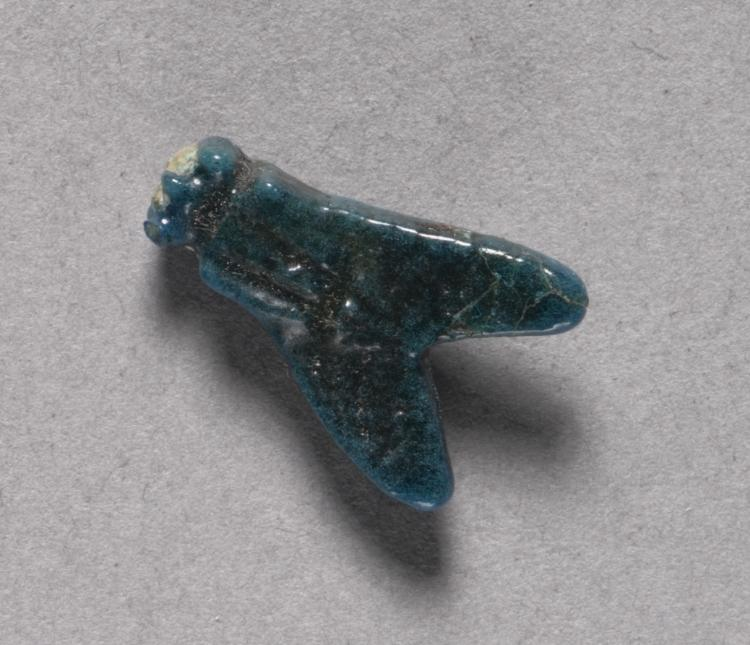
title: Fly Amulet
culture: Egypt, Middle Kingdom (2040–1648 BCE)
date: 2040–1648 BCE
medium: deep turquoise green faience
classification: Amulets